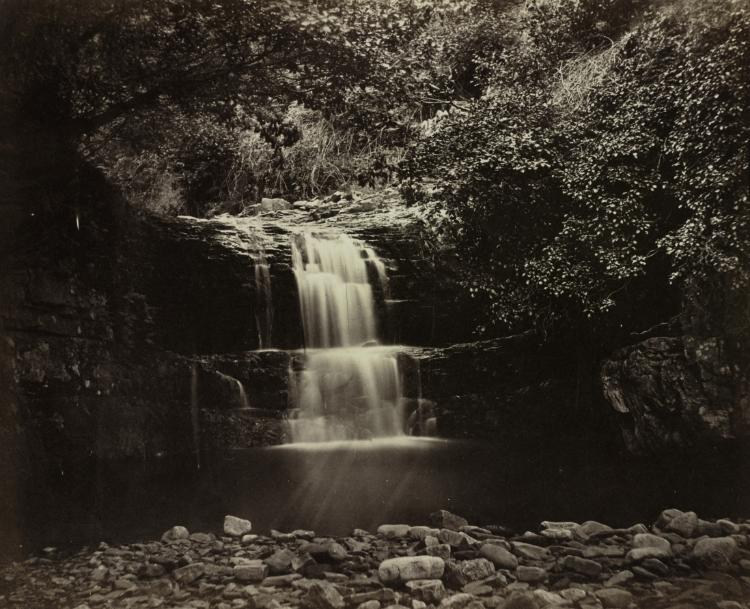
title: Vale of Neath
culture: England, 19th century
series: The Photographic Album for the Year 1855, Being Contributions from the Members & the Photographic Club, pl. 25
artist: G. B. Gething (British, active 1850s)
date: 1854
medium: albumen print from dry collodion negative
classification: Photograph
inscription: Written in pencil on verso: "27 [circled]"; "1830 G.B. Gething, Vale of Neath [Vale of Neath underlined]"